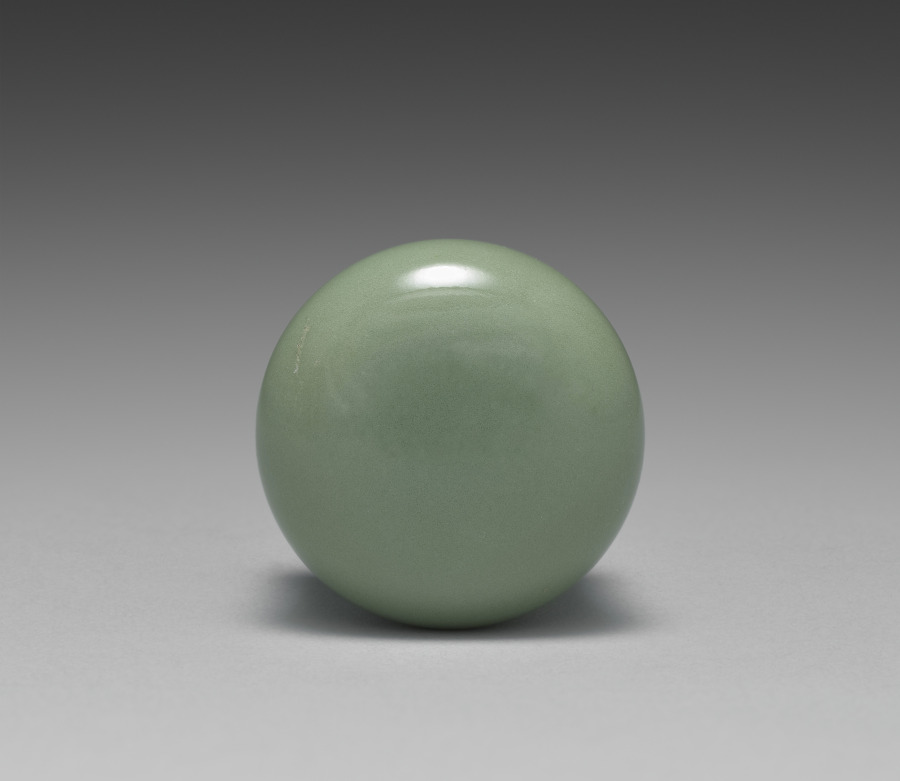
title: Roller End for Hanging Scroll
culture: Japan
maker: Seifū Yohei III (Japanese, 1851–1914)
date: 1893–1914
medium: One of a pair of hanging scroll roller ends; porcelain with celadon glaze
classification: Ceramic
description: Before entering into his apprenticeship with Yohei II, Seifū Yohei III trained as a painter in Osaka. He continued to paint throughout his career as a ceramist. As part of his ceramic practice, Yohei III also made roller ends to be placed at either end of the wooden dowel around which the lower part of a hanging scroll mounting is wrapped. These served both as weights for the painting and as knobs for handling it when rolling and unrolling. The pair here is made of porcelain with a green glaze.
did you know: This is one of two roller ends for the hanging scroll by Seifū Yohei III, Rain Clearing over a Summer’s Mountain, CMA 2022.151.